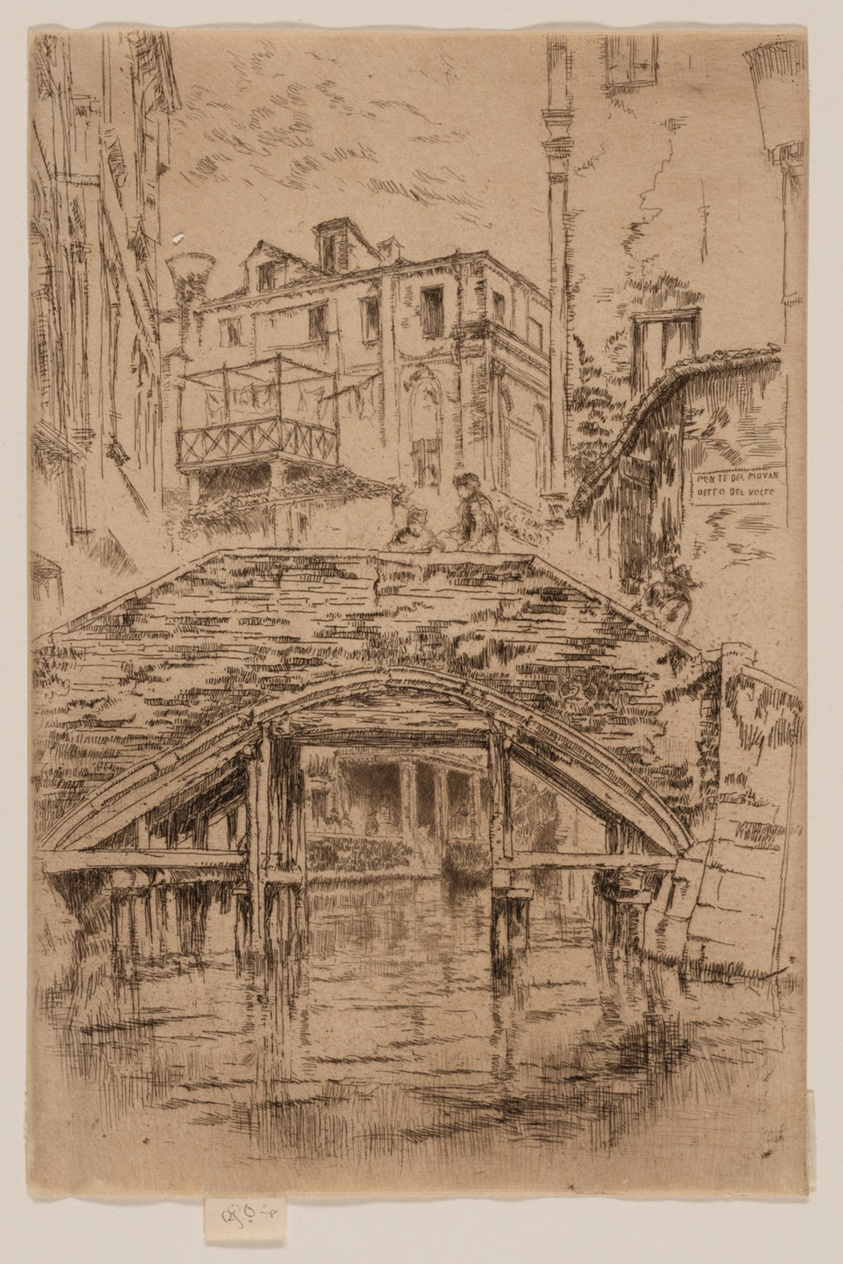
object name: Print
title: Ponte del Piovan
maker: James McNeill Whistler (American, 1834-1903)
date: 1879/80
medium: Etching and drypoint with foul biting in dark brown ink on cream laid paper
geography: United States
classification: etching; foul biting; print; prints and drawing; drypoint; paper